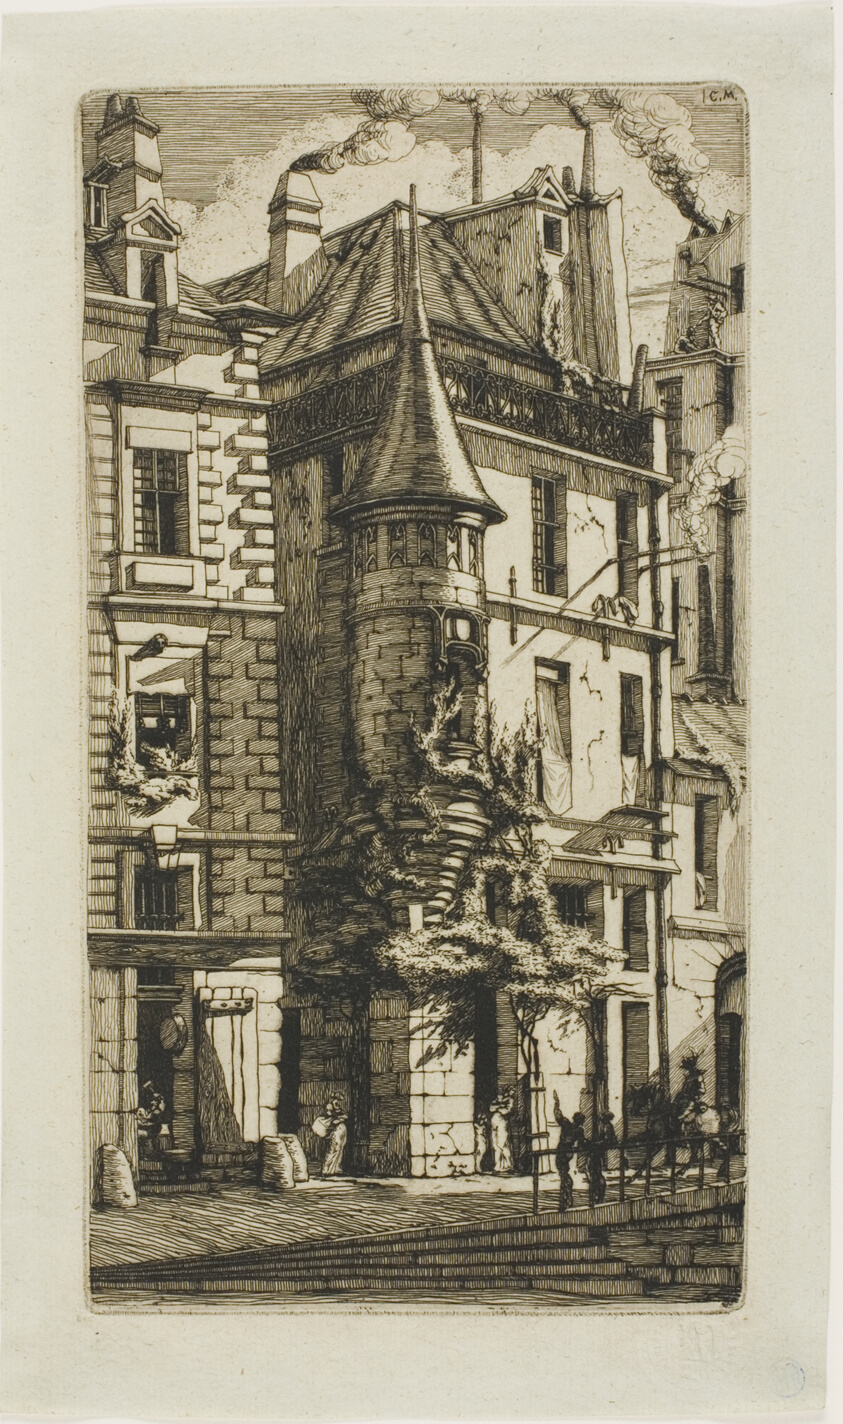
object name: Print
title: House with a Turret, rue de la Tixéranderie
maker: Charles Meryon (French, 1821-1868)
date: 1852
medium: Etching on verdâtre (greenish) laid chine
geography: France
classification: etching; print; prints and drawing